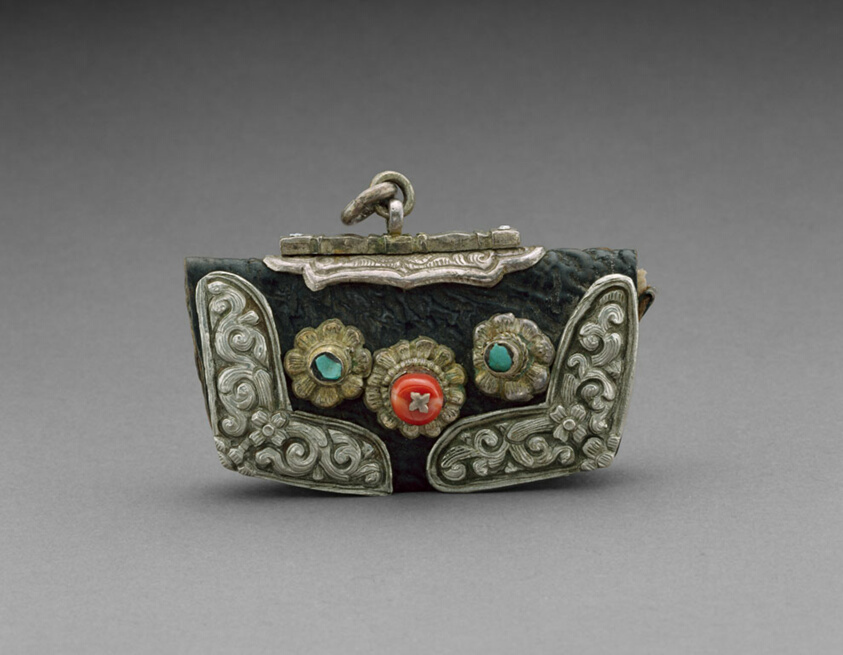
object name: Costume and Accessories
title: Tinder Pouch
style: Himalayan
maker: Tibet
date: 19th century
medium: Silver, leather, turquoise and coral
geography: Tibet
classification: jewelry; asian art; costume